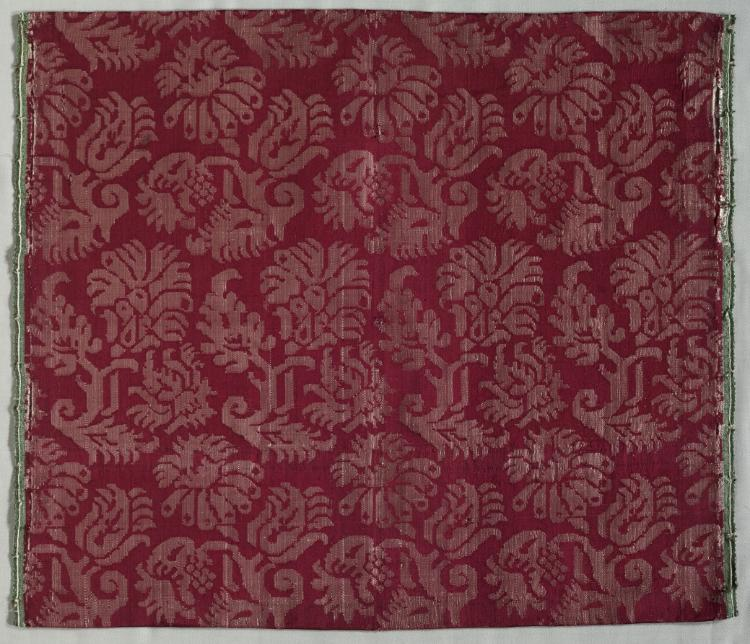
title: Two Lengths of Silk Damask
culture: Italy, 17th century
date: 1600s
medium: damask, silk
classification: Textile